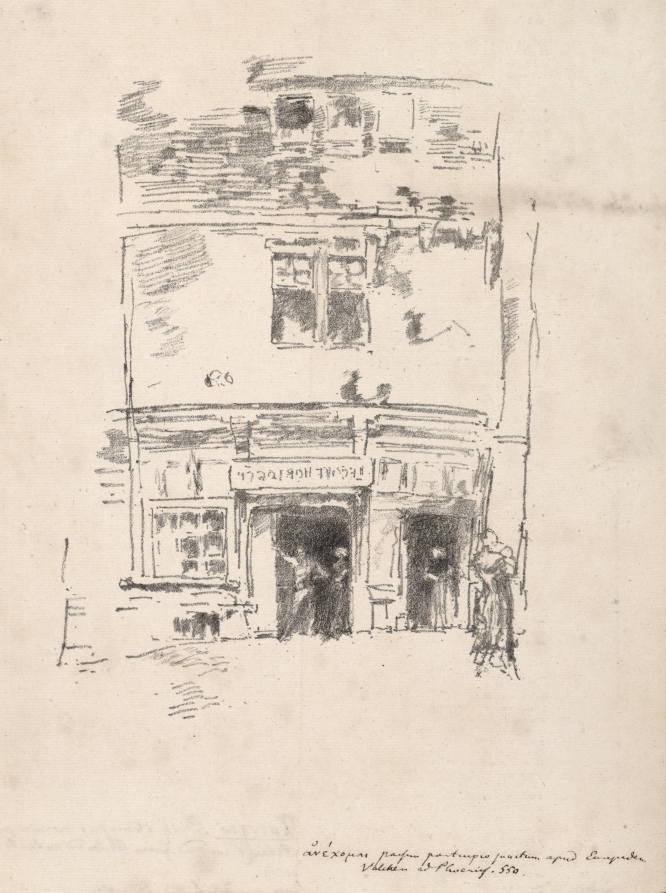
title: The Clockmakers, Paimpol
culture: America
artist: James McNeill Whistler (American, 1834–1903)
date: 1893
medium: lithograph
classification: Print